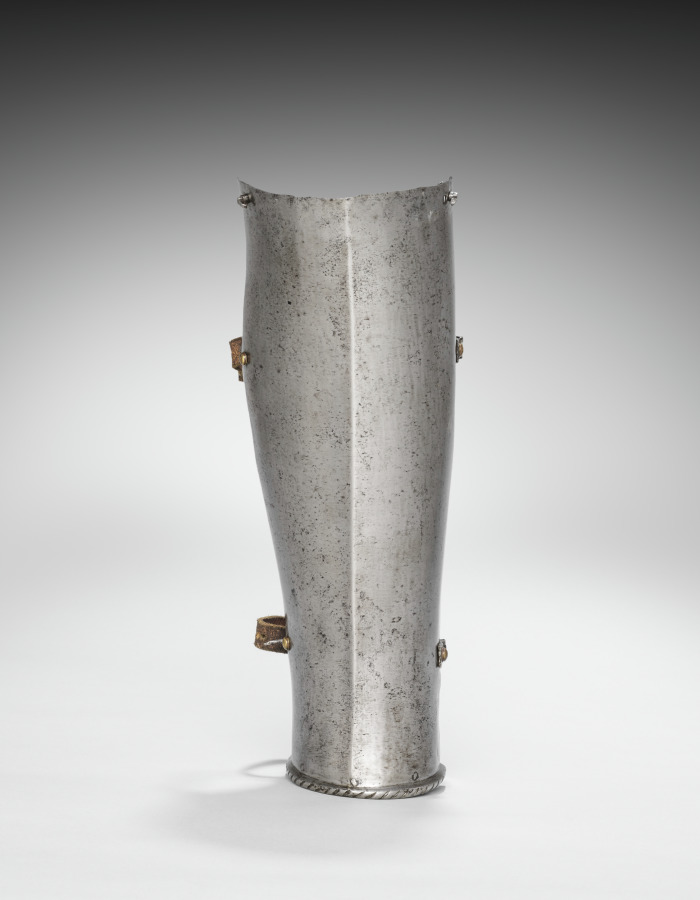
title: Proper Left Greave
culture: South Germany, 16th century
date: c. 1560–80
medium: steel, leather straps, brass rivets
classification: Arms and Armor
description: This armor was developed for the joust-a sporting combat between two mounted contestants. Although all of the elements of this armor date from the same period, they are not all from the same suit. This armor is thus called "composed." It also shows the asymmetry of jousting armor. The participants rode along a wall-like barrier known as a "tilt" with their left sides facing one another. Consequently, armor on that side of the body had to be thicker. Note the large plate (grandguard) over the left shoulder for extra protection. Also, the breathing holes in the helmet were placed on the right side (farthest from an opponent's lance) to avoid injuries from splinters. The bracket attached to the right breastplate is called the lance-rest, a shock-absorbing support designed to accommodate the lance when "couched" under the right armpit.